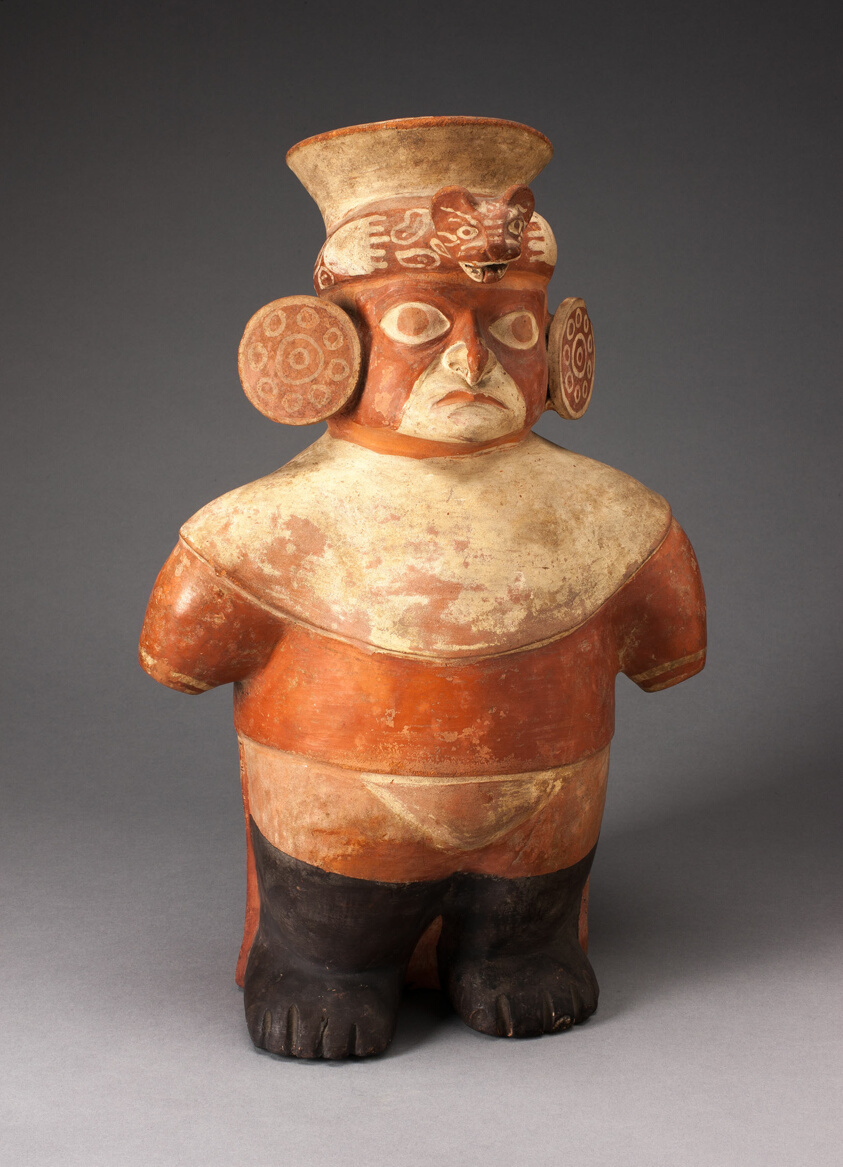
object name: Vessel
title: Jar in the Form of a Figure with Painted Head, Large Earflares, and Feline Headdress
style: moche, mochica, early intermediate period, Pre-Columbian, americas, Arts of the Americas, andean, andes, south american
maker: Moche (North coast, Peru)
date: 100 BCE–500 CE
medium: Ceramic and pigment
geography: Peruvian North Coast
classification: earthenware; ceramics; vessel; art of the americas